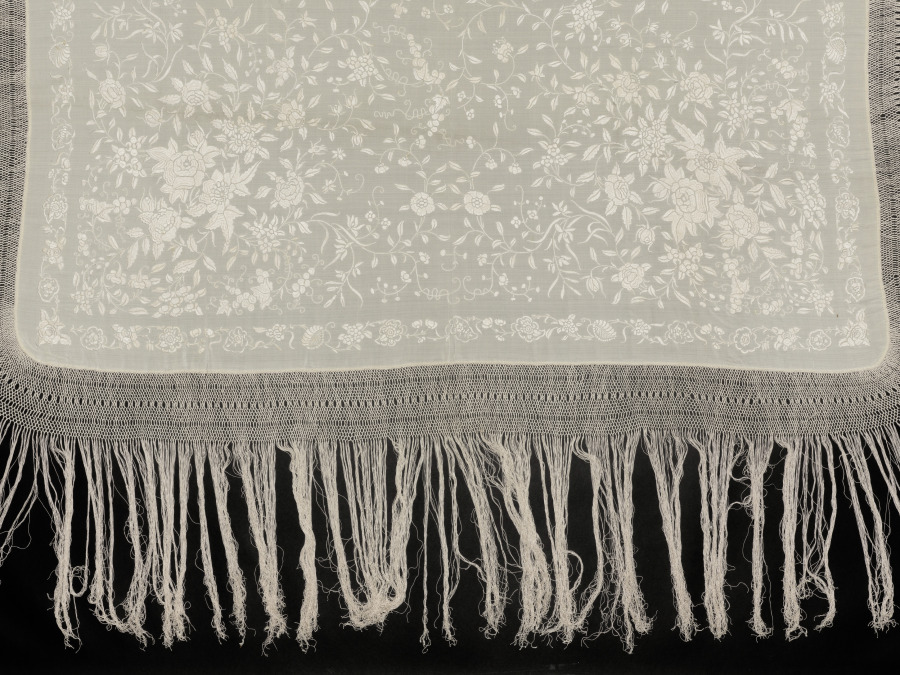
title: Silk Shawl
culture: China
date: 1800s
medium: embroidery, silk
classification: Embroidery